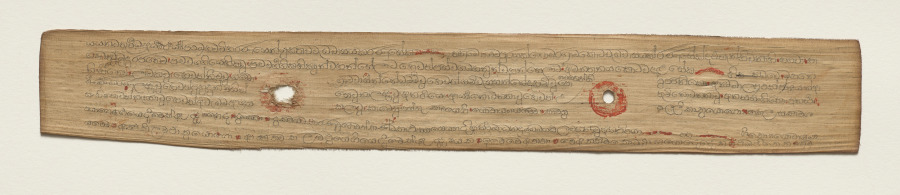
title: Leaf from a Buddhist Manuscript (verso)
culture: Sri Lanka, Singhalese, Late 17th century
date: c. 1700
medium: fiber paper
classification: Manuscript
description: Palm leaf material is still used for manuscripts in Sri Lanka. The palm leaves are prepared first by boiling them, drying them in the sun, and then rubbing them with oils. Scribes then use a metal stylus to incise the text. Then charcoal powder is wiped across the pages, filling in only the inscribed lines.